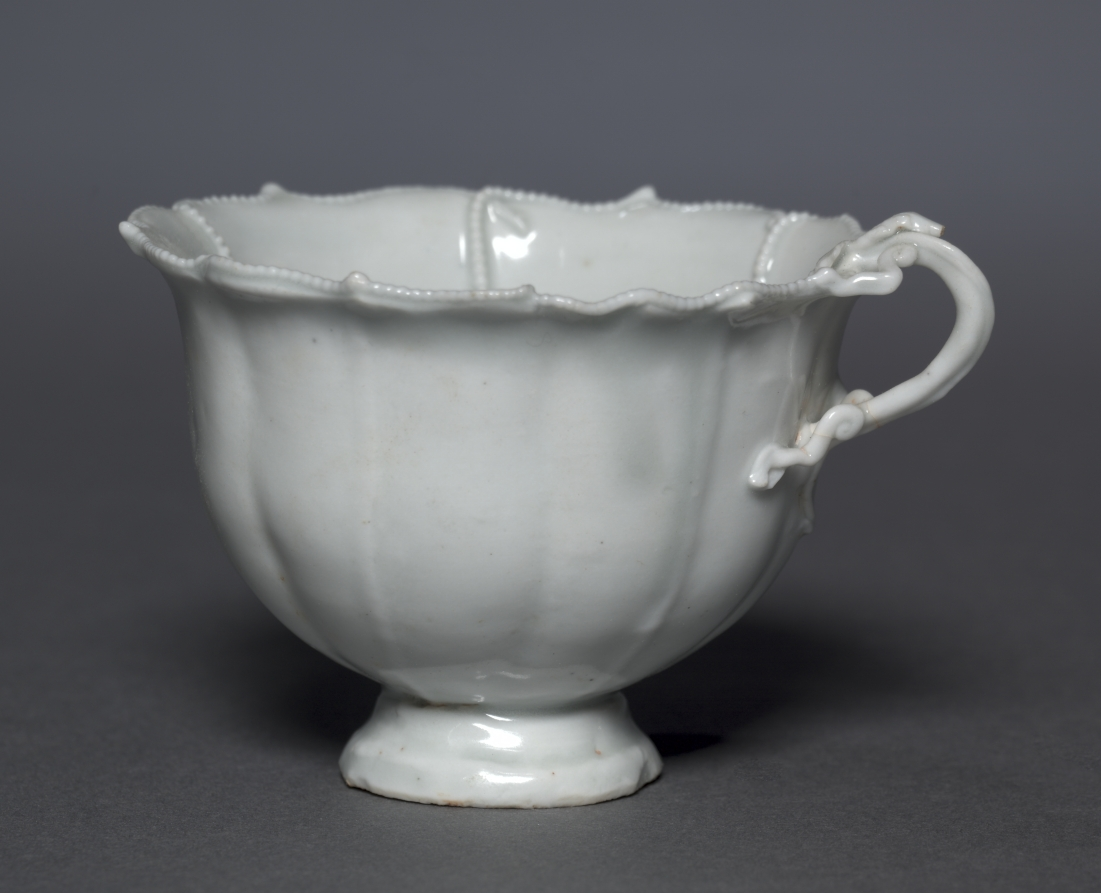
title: Fluted Cup with Dragon Handle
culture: China, Jiangxi Province, Jingdezhen kilns, Yuan dynasty (1271–1368)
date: early 1300s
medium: Glazed porcelain, Qingbai (bluish-white) ware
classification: Ceramic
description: Very thinly potted, the subtly lobed body of this cup is almost translucent. The thin, slightly opaque, light greenish glaze lends a sugary shine. Applied elements, including the handle, beaded borders, and sculptural floret, are constructed and glazed with the same materials as the body, providing a seamless blend of form and decorative embellishment. The result is an evocative reminder of slightly earlier silver cups, also created in the form of flowers. This pristine, natural construction is challenged, however, by the archaic dragon that acts as the handle. Borrowed from the decoration found on much earlier bronzes, this added form illustrates the eclecticism of the Yuan, the attempt to blend present vision with interest in the past.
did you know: Clay beading divides the cup's interior into six foliate panels with a six-petaled flower at the junction of the beaded lines.